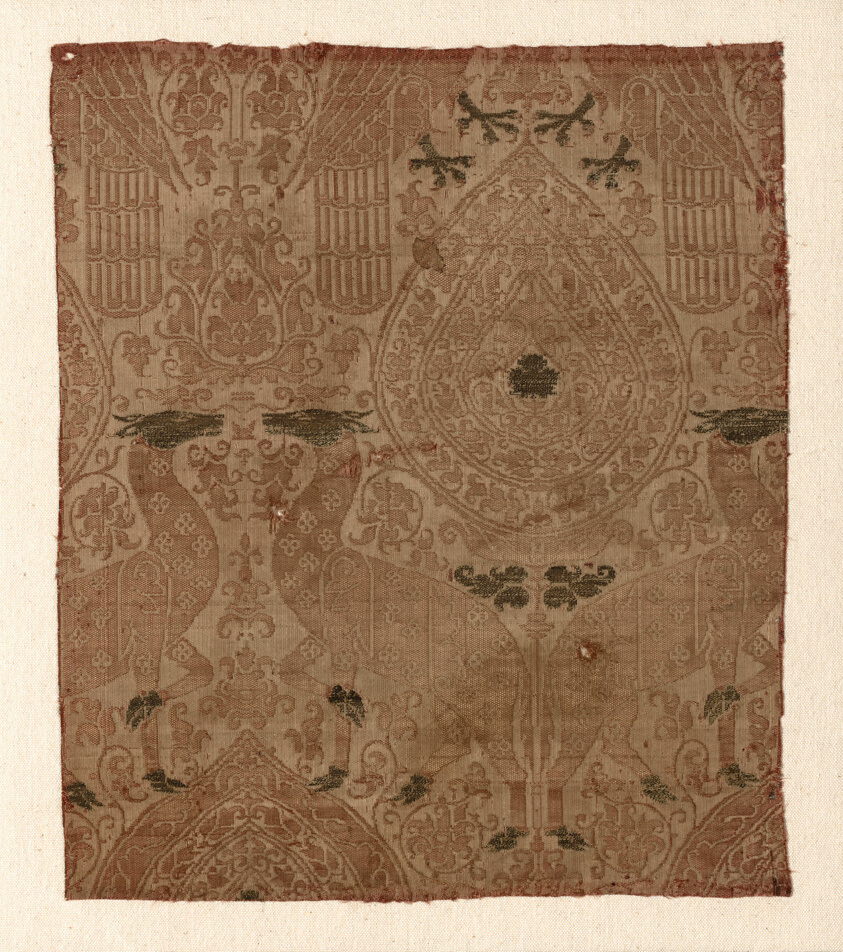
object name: Textile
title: Fragment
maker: Italy or Spain or the Middle East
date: 13th century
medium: Silk and gilt animal substrate wrapped linen, plain weave with supplementary patterning and brocading wefts bound by secondary bingding warps in plain interlacings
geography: Lucca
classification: textile; weaving